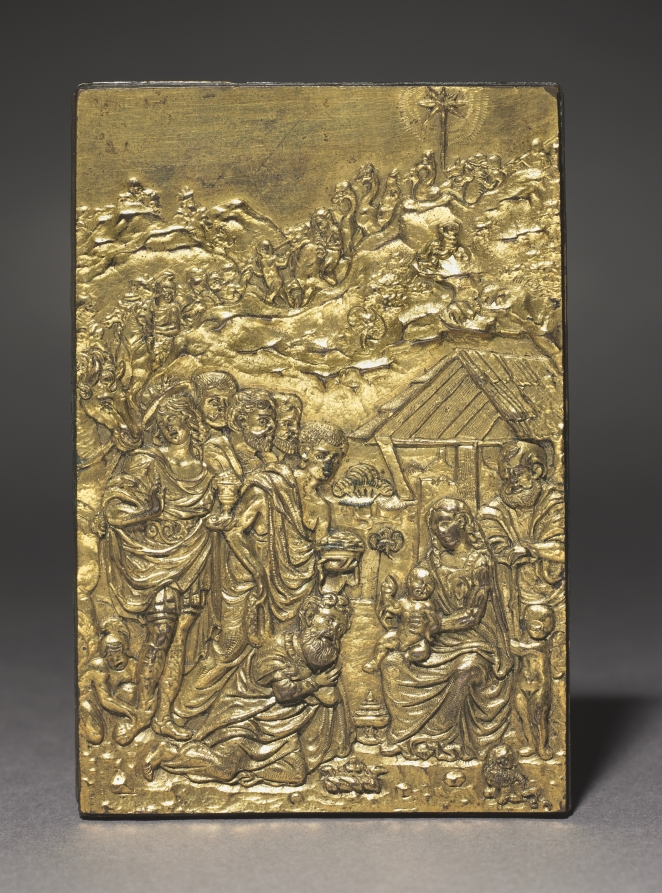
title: Pax with the Adoration of the Magi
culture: Italy, 16th century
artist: Moderno (Italian, 1467–1528)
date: c. 1500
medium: gilt bronze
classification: Sculpture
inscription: inscription on back: ANDREAEAIA RDO, ARCHI EPISCOPO BRVNDI SINO, IOANNES BAPTISTA FONTANVS, AVRIFEX, DONO DEDIT A.DNI.M.D.L.XXXXIII.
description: A pax is a small flat tablet decorated with Christian images and meant to be kissed by the priest before Communion. This plaquette likely had a tabernacle-shaped frame which has been cut away. Here the Madonna sits before a stable with a nude Christ Child seated on her right knee. A star with a long vertical ray radiates in the distance above the stable. Joseph stands on the right edge of the relief, while a nude child, likely a young John the Baptist, appears beside Joseph. The Three Kings approach the Holy Family with gifts, the first kneeling, his arms folded across his chest, while a kneeling male, nude except for a helmet, adjusts the sandal of the third king. A long procession follows the magi, continuing diagonally up the rocky hills in the background. This rocky landscape and crowded figures animate the surface, conveying the excitement and haste as visitors journey to see the newborn king. An inscription on the back of the plaquette reads "This has been given as a gift to Andrea Aiardo, Archbishop of Brundisi by Ioannes Baptista Fontanus, Goldsmith, in the year of our Lord 1583." Other versions of this plaquette exist in the British Museum, the Victoria and Albert Museum, the Louvre, the Berlin State Museums, and the Metropolitan Museum of Art. --Ana Dieglio (2009)